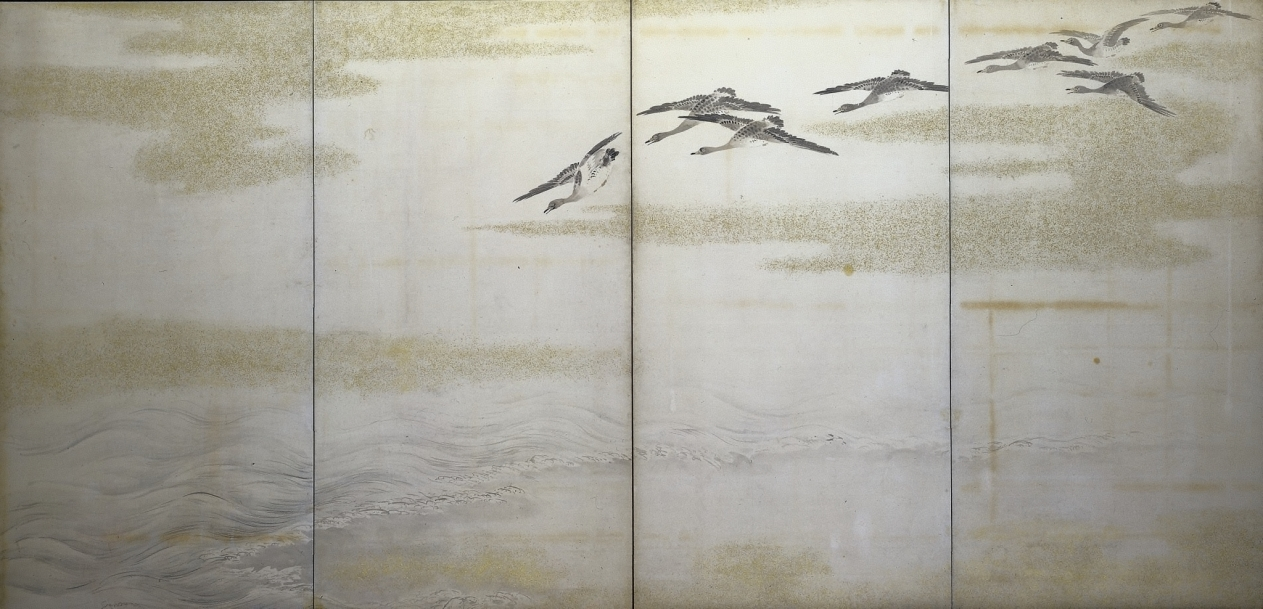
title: Geese, Reeds and Water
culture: Japan, Edo period (1615–1868)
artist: Yamamoto Baiitsu (Japanese, 1783–1856)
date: 1800s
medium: One of a pair of four-panel folding screens; ink, color, and cut gold foil on paper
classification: Painting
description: This byōbu composition differs from most in that it comprises two four-panel screens, rather than two six-panel units. Since the current mounting is modern, it is impossible to determine whether its present configuration represents its original design. Some panels may have been removed to help the screens better fit into a modern interior space. Baiitsu worked almost exclusively in monochromatic ink tones and favored classical Chinese painting themes.